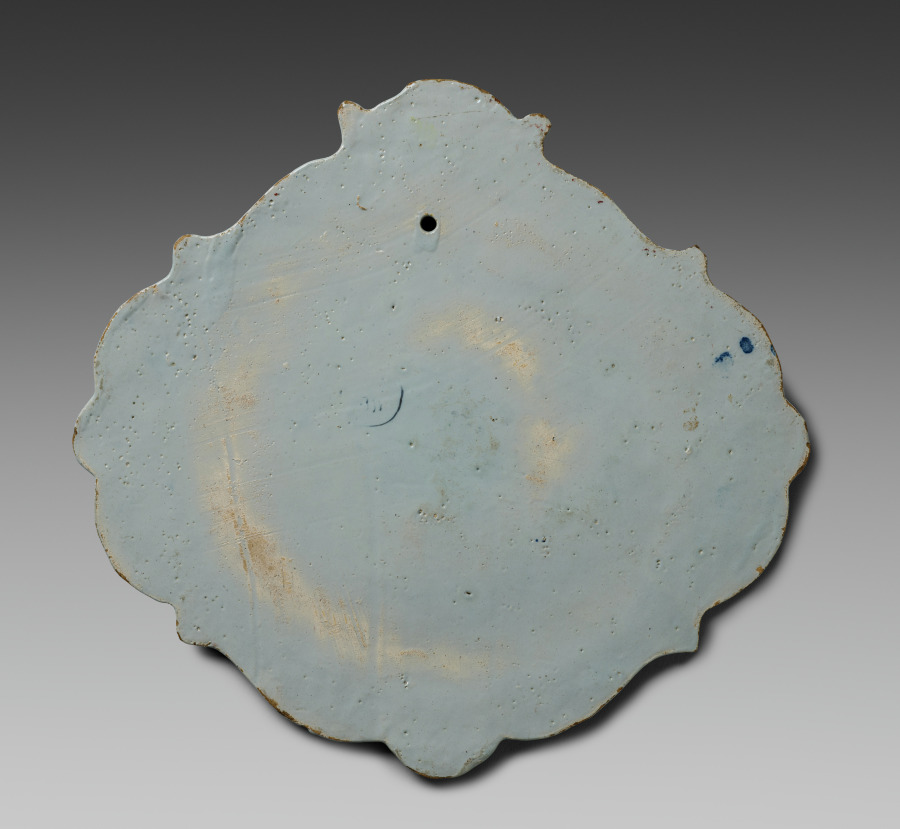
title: Plaque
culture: Netherlands, Holland, Delft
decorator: Unknown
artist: after Jacopo Amigoni (Italian, 1675–1752)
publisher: after Joseph Wagner (German, 1706–1780)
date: c. 1750–70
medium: delft ware (tin glazed earthenware)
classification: Ceramic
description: This plaque depicts the biblical scene of the finding of Moses. The Book of Exodus recounts how during the captivity in Egypt of the Jewish people, the pharaoh decreed that all newborn sons of Hebrews should be cast into the river. The infant Moses was placed by his mother in a basket among the bulrushes. He was discovered there by the pharaoh’s daughter, who is shown here under the parasol, accompanied by her servants. A plaque after the same print is in the Rijksmuseum, Amsterdam.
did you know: The iconic blue-and-white ceramics from Delft originated as an attempt to copy Chinese porcelain.